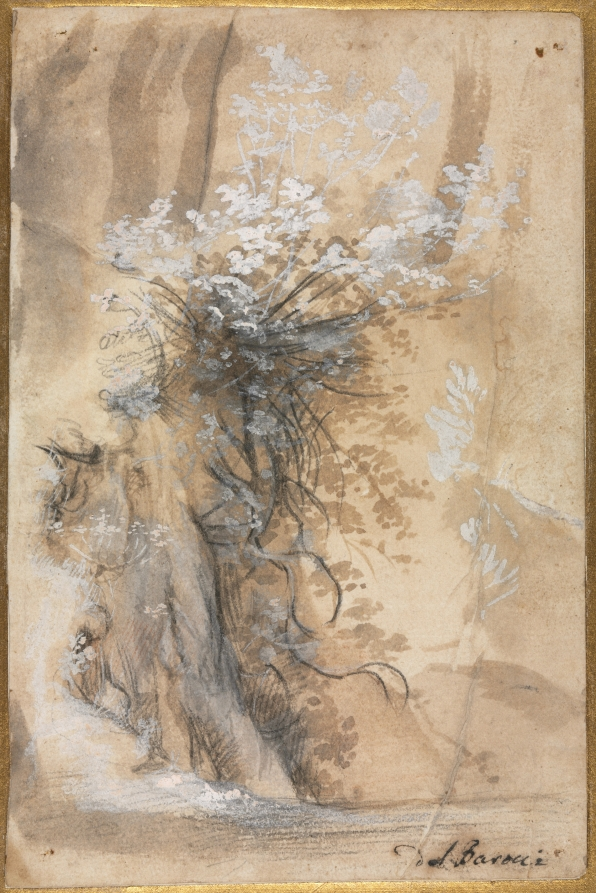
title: Flowering Bush above an Eroded Bank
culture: Italy, 16th century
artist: Federico Barocci (Italian, 1528–1612)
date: c. 1572–1604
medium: black chalk, brush and brown wash, and lead white (partially oxidized), with traces of red chalk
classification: Drawing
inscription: lower right, in brown ink: del Barocci ; VERSO, across top, in brown ink: Originale del Barocci ; lower right, in graphite: D217EHLX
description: Federico Barocci, who worked in Urbino, made landscape sketches for use in his paintings and as independent studies. The artist’s multimedia approach—combining chalks, ink washes, and opaque paints—was novel at the time but would become standard practice for landscape artists working in later centuries. Novel, as well, was his interest in excerpts of the natural world rather than fully realized scenes. Here, the artist drew an eroded bank with a few bold lines in black chalk, then used a brush to layer brown and white ink washes, capturing the untamed clump of earth with remarkable naturalism.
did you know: This drawing is believed to have once been in the collection of two brothers who were considered the premier academic painters in 19th-century Rome.